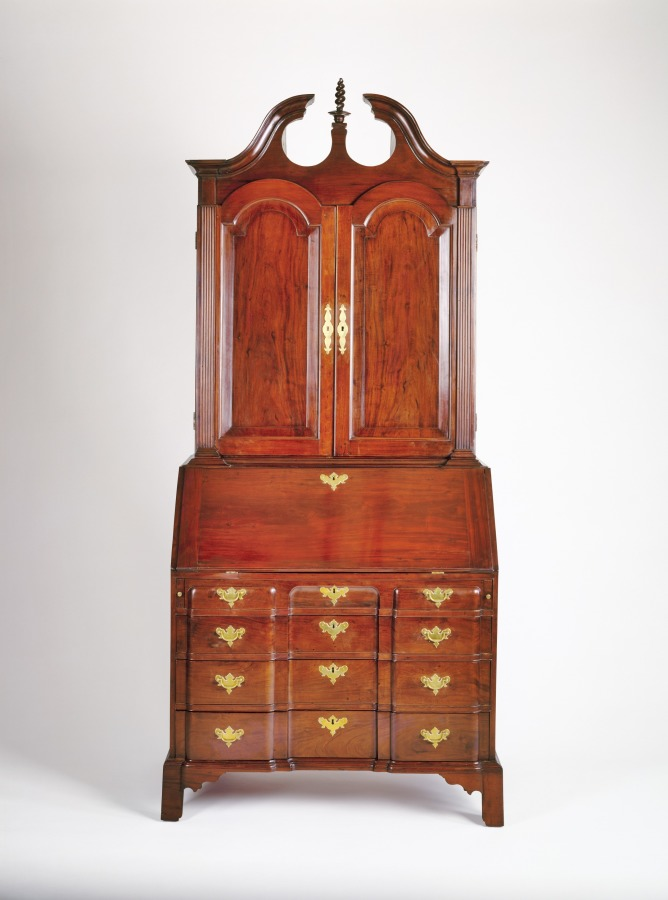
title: Desk and Bookcase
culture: America, Massachusetts, Boston or vicinity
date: c. 1780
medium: mahogany and pine, brass hardware, gilding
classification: Furniture and woodwork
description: During the 1700s, a desk and bookcase, sometimes called a bureau in early inventories, was among the largest and most expensive pieces of furniture in a household. Their owners were chiefly businessmen and community leaders, and because of their function as repositories for personal letters and documents, they were usually placed downstairs in a back parlor or hall. A desk and bookcase consisted of two parts: usually a slant-top desk below and a cabinet above that sat within moldings applied to the desktop to hold it in place. The form often included elements derived from contemporary architecture. Like much New England furniture of the later 1700s, the lower section of this example is block-fronted, in which the profile recedes in the center and protrudes at either side. Though some European precedents can be found for block fronting, this type of cabinetry was clearly more popular in America than anywhere else.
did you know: A desk and bookcase in the 1700s, often equipped with several locks and keys as in this example, served as a self-contained office for the gentleman of the household.